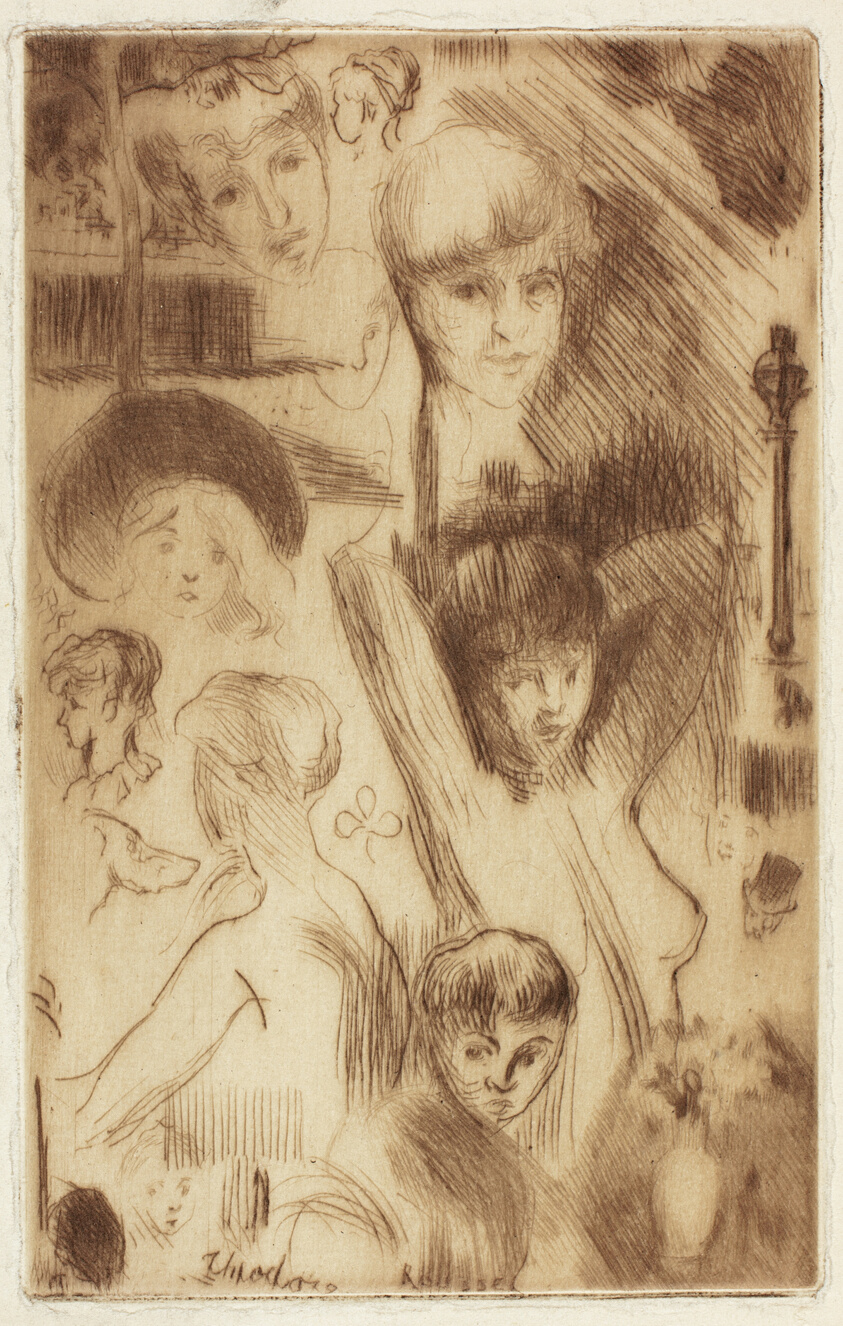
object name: Print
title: Sketch Plate, Parson's Green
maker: Theodore Roussel (French, worked in England, 1847-1926)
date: 1906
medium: Drypoint in brown on cream laid paper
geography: England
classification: drypoint; print; prints and drawing